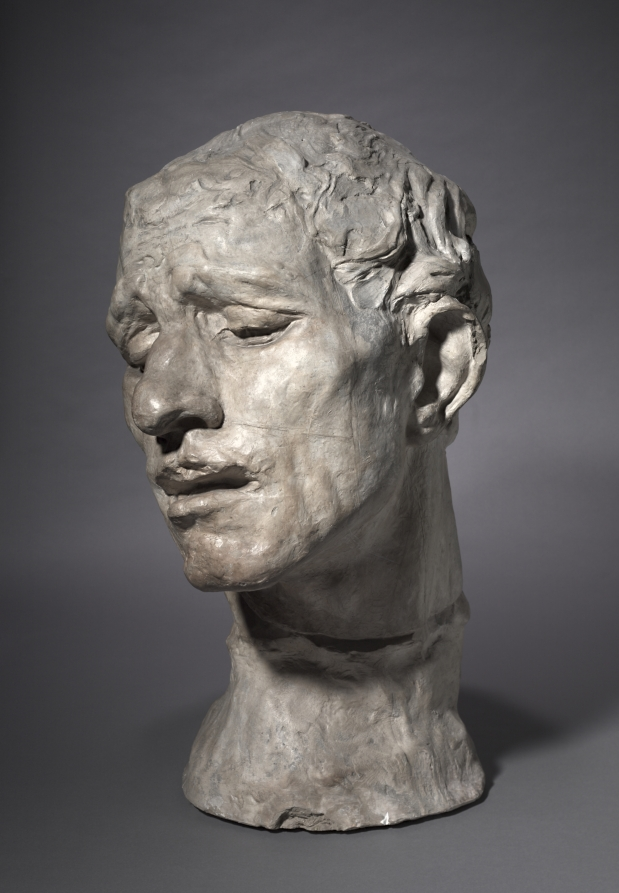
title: Heroic Head of Pierre de Wissant, One of the Burghers of Calais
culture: France, late 19th-early 20th Century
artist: Auguste Rodin (French, 1840–1917)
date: 1886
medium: plaster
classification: Sculpture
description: This sculpture depicts one of the figures in Rodin’s large public monument The Burghers of Calais (1884–89), featuring six French men who volunteered to be taken prisoner by the English in exchange for lifting the siege of Calais during the Hundred Years War (1337–1453). Pierre de Wissant’s anguished expression suggests extreme mental suffering as he contemplates his expected execution. Rodin exhibited a life-size version of the figure as an independent work before completing the monument. He later made multiple versions in various sizes and media. This plaster features a highly expressive, hand-worked surface inscribed in places with graphite and covered with delicate, tinted washes.